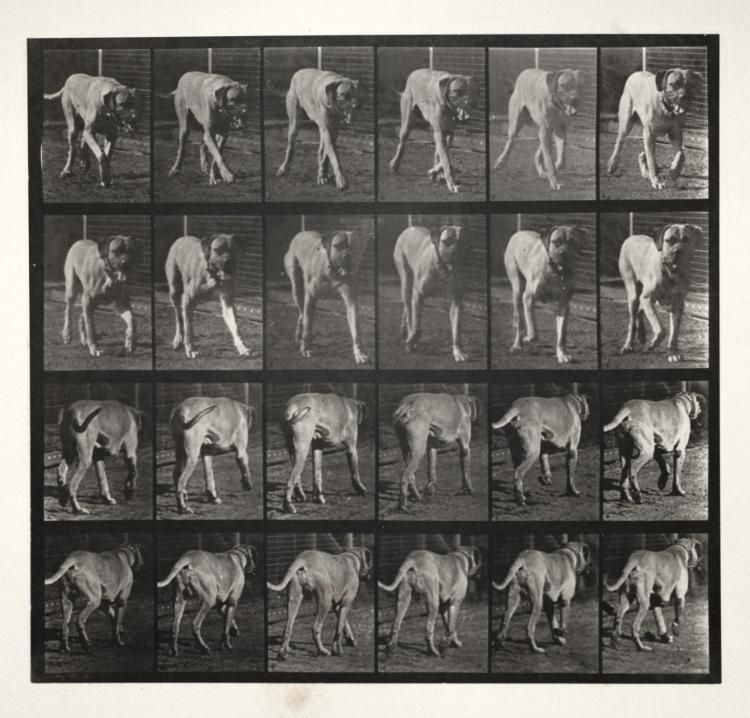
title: "Dread" Trotting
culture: America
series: Animal Locomotion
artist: Eadweard J. Muybridge (American, 1830–1904)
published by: University of Pennsylvania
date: 1887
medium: collotype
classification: Photograph